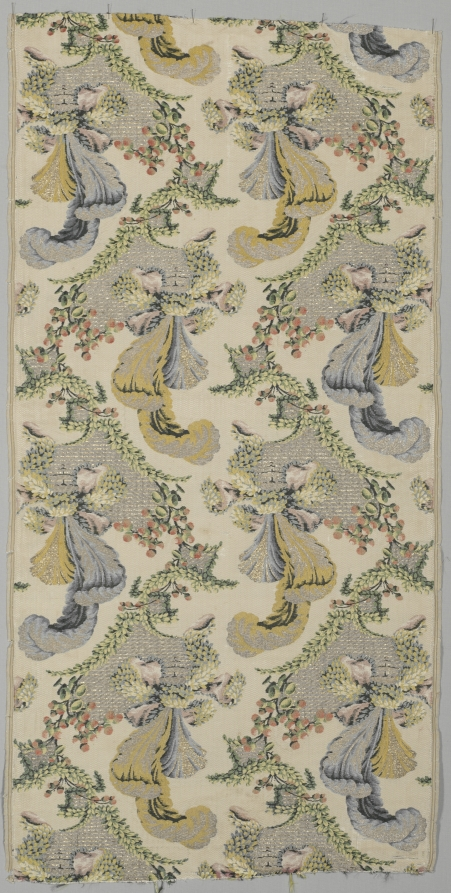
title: Length of Textile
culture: France, 18th century, Period of Louis XV (1723-1774)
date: 1723–1774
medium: brocade; silk and metal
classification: Textile